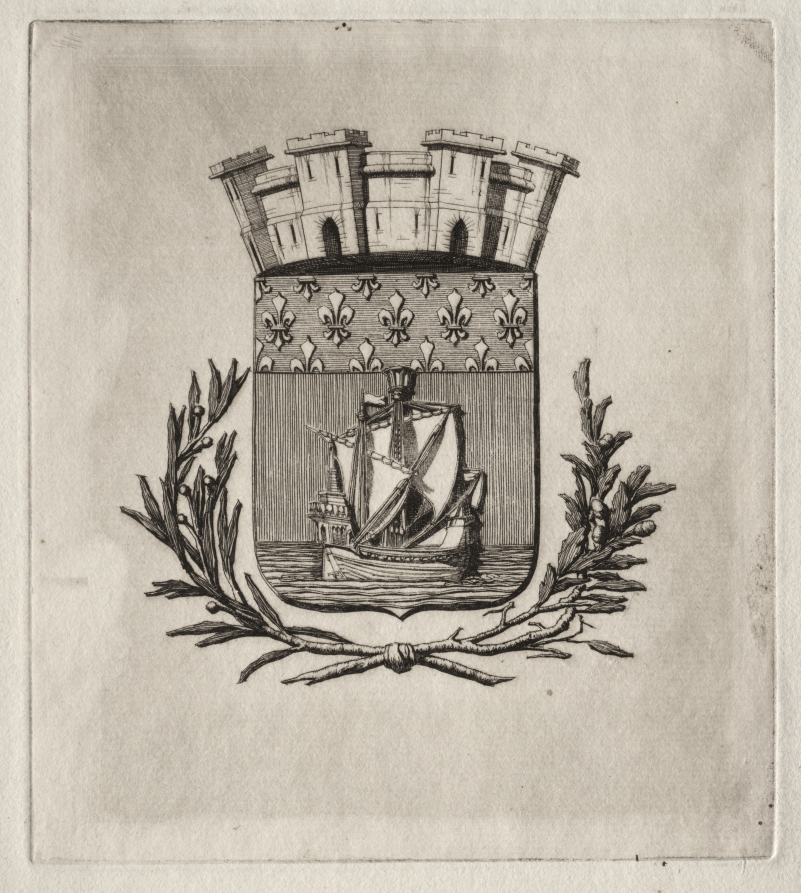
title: Etchings of Paris: The Symbolical Arms of the City of Paris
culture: France, 19th century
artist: Charles Meryon (French, 1821–1868)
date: 1854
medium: etching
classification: Print